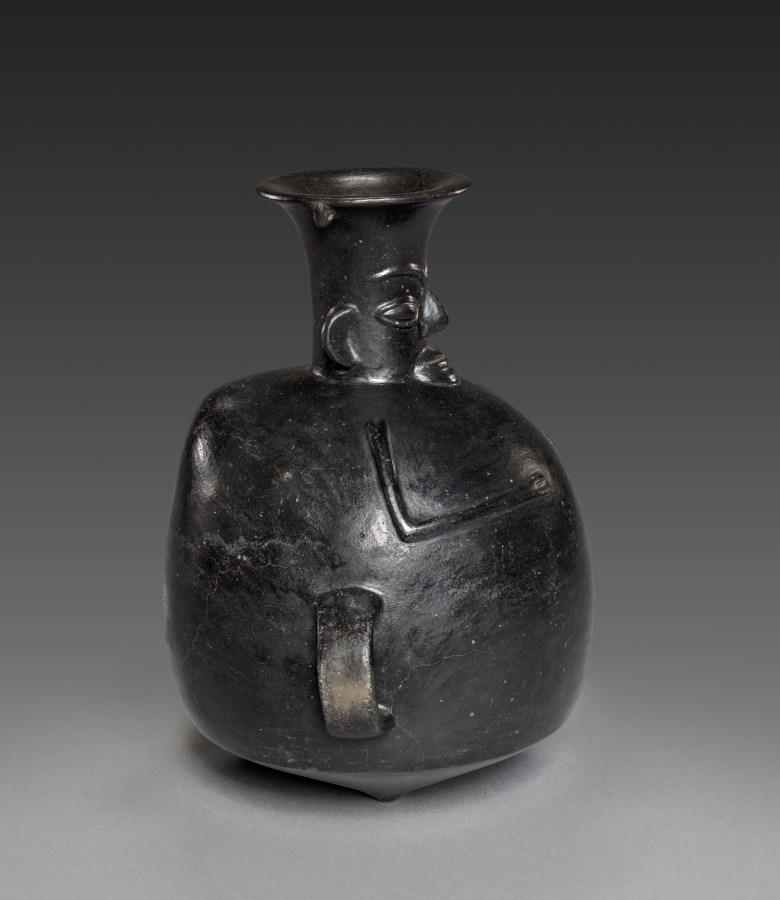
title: Hunchback Vessel (Aryballos)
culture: Central Andes (Peru), Chimú-Inka style, Late Horizon period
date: 1470–1521 (Thermoluminescence date, 1315–1615)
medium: ceramic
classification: Ceramic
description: This handsome vessel, along with the nearby double-chambered vessel, were made on the north coast after the Inka conquered the Chimú in the 1460s. Under Inka rule, many aspects of Chimú ceramic technology continued but new forms and subjects were introduced, such as the aryballos, a classic Inka vessel type. This example takes the form of a hunchback and may refer to the Inka predilection for employing hunchbacks as royal servants.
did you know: Hunchbacks seem to have functioned as servants in Inka royal palaces.